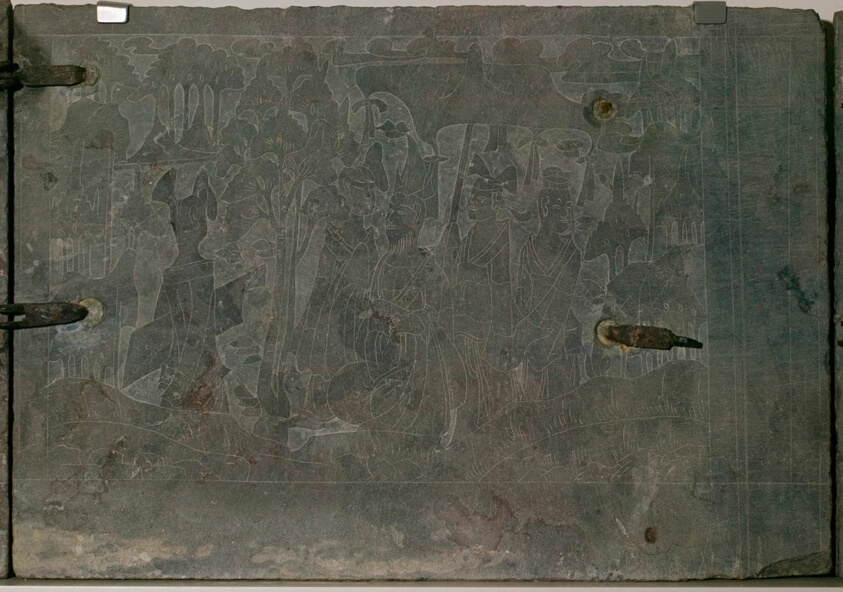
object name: Religious/Ritual Object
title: Panels from a Funerary Couch (Guanchuang)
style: Chinese (culture or style)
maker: China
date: Northern Wei dynasty (386–535); c. 525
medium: Limestone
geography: China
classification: stone; sculpture; asian art; ritual objects